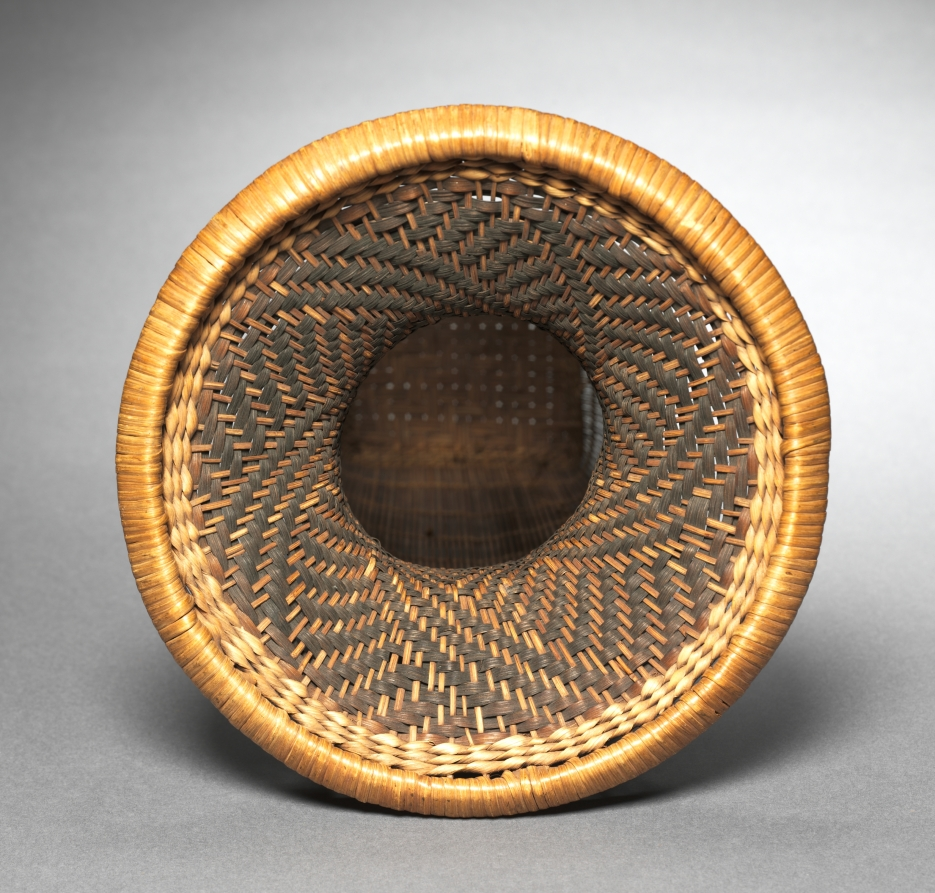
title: Sifting Basket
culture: Africa, Central Africa, Democratic Republic of the Congo or Angola, possibly Chokwe-style maker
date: before 1915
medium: Plant fibers and dye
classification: Tool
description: The Chokwe pounded maize into a course flour and then sifted it in order to separate the finest flour for cooking. This domestic object exhibits a refined, elegant artistry in its proportion, shape, and integrated woven textures.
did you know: F. M. Rapp––who acquired this basket in Congo while working for a diamond mine––attended the Case School of Applied Science in Cleveland.